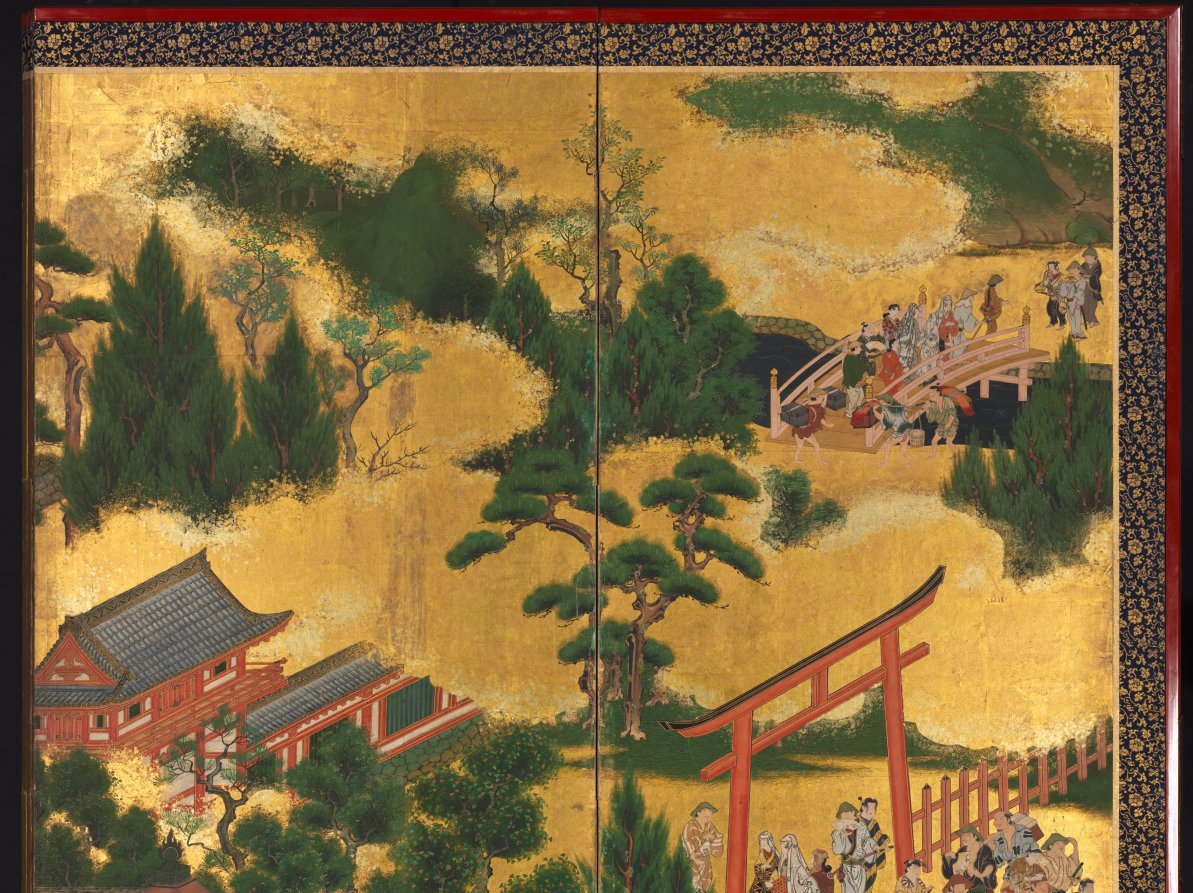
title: Horse Race at the Kamo Shrine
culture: Japan, Edo period (1615–1868)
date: early to mid-1600s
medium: One of a pair of six-panel folding screens; ink and color on gilded paper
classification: Painting